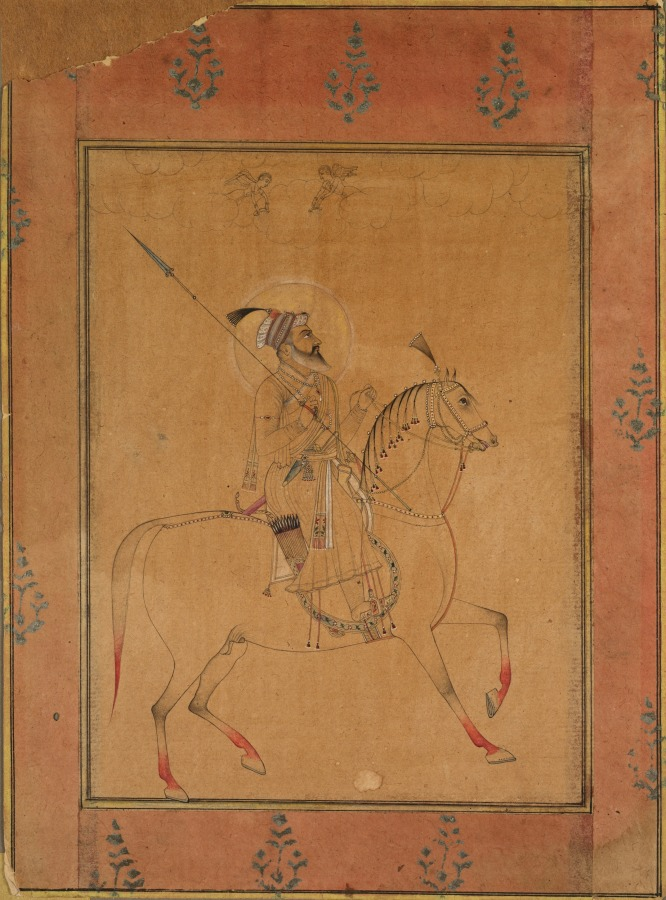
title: Emperor Shah Jahan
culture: India, Mughal Dynasty (1526-1756)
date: late 1600s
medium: Gum tempera and ink on paper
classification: Painting